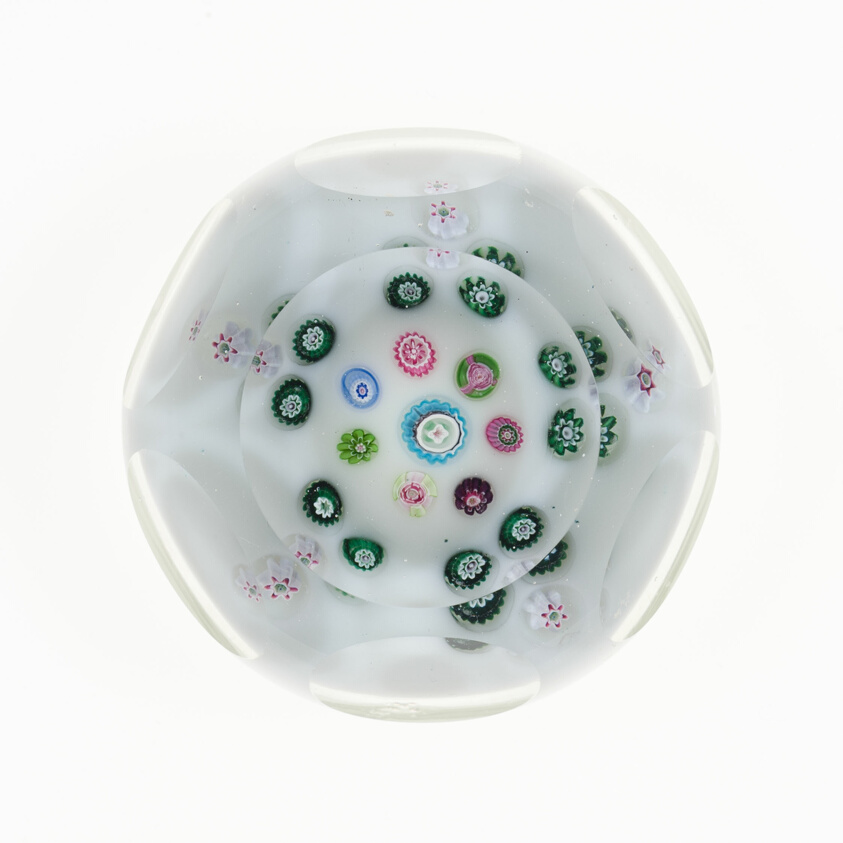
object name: Glass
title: Paperweight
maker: Clichy Glassworks (Cristalleries de Clichy); Clichy, France, 1837-1885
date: 19th century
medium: Glass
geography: Clichy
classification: paperweight; millefiori; european decorative arts; glass